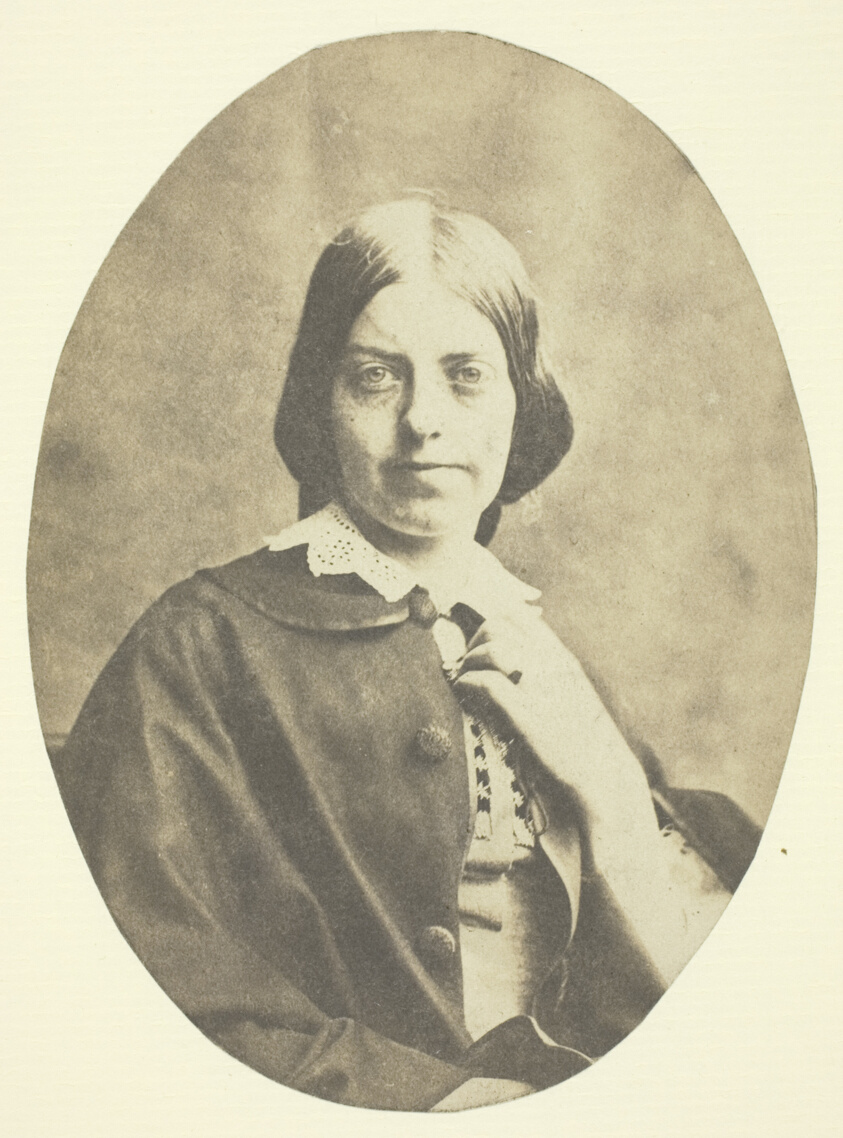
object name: Photograph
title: Mrs. Craik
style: 19th century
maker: Artist unknown, possibly Benjamin Mulock (English, 1829–1863); English, 19th century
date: 1848/60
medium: Calotype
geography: England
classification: salted paper print; photographic process; photography; photograph